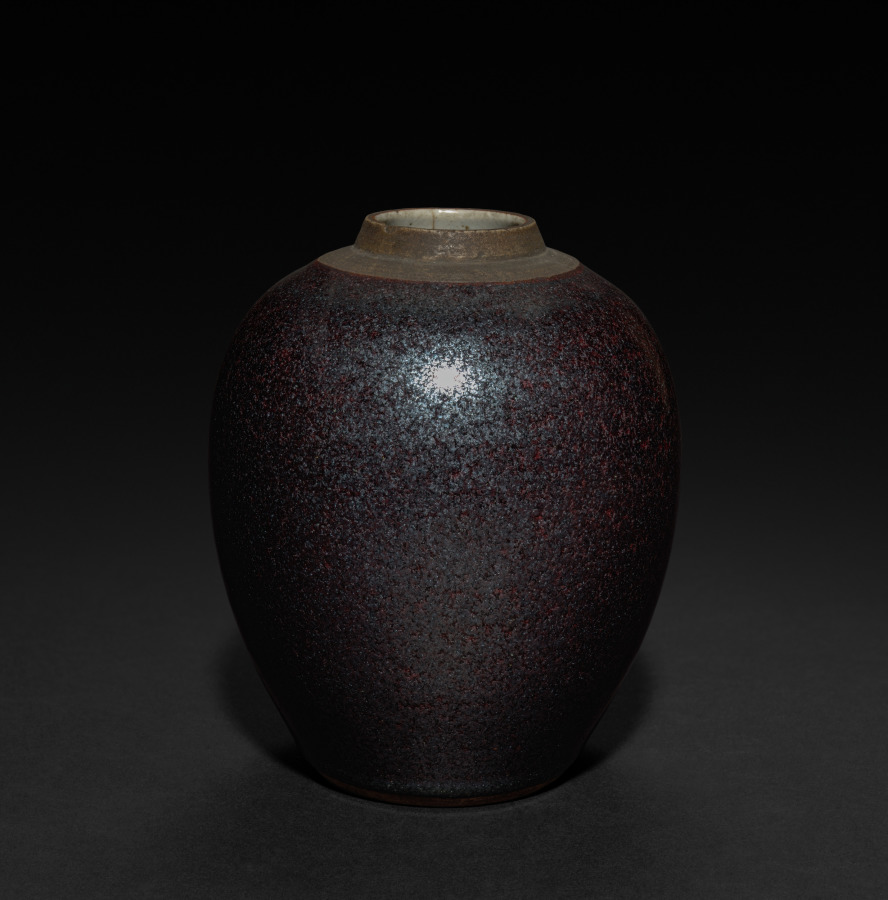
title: Jar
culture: China, Qing dynasty (1644–1911), Qianlong reign (1736–95)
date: 1736–95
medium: porcelain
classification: Ceramic